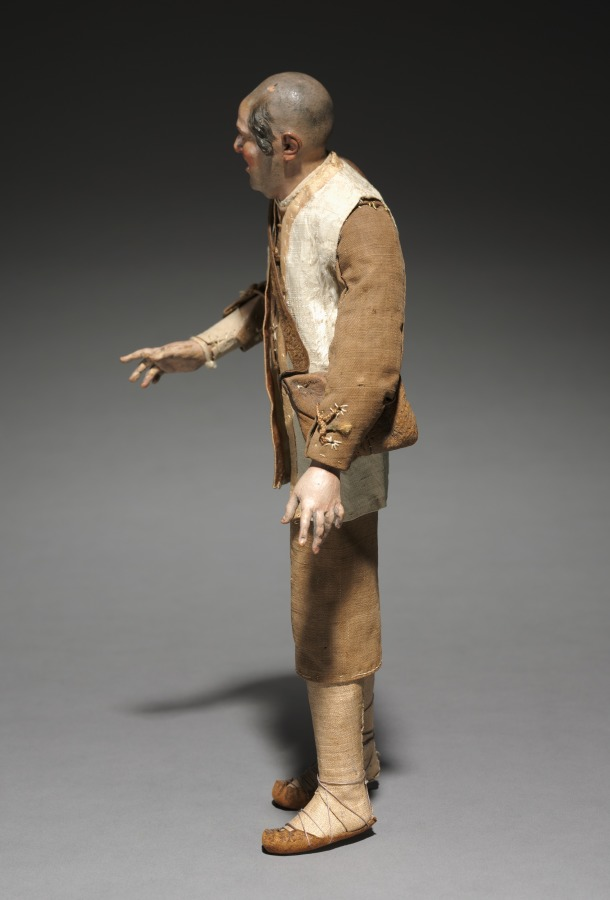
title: Figure from a Crèche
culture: Italy, Naples, late 18th-early 19th century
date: 1780–1830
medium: painted wood and terracotta with various textiles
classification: Sculpture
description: The practice of creating scenes of the Nativity for the home dates from the early 1700s in Italy, where people began to set up doll-like figures of about a foot or less in height. The custom was particularly popular in Naples around 1800, where crèche scenes (crèche means cradle, or crib) included many figures, whose heads and hands of painted terracotta, stuffed cloth bodies, and clothing adapted from contemporary local costumes gave them an amazingly realistic character. Representations of the birth of Jesus can be traced to the first few centuries of Christianity. Both living creatures and sculptural depictions of them were used from early times. By the late middle ages it was customary to create life-size figures of wood or stone, naturalistically painted, to represent the characters who participated in the events of Jesus's early life. These sculptures were then arranged in scenes illustrating one or both of the most important of these events, the Adoration of the Shepherds and the Adoration of the Magi-the three kings from the East who came to pay homage to the Christ child. Used in churches, these large figures were especially popular in Italy, Central Europe, Spain, and Portugal.